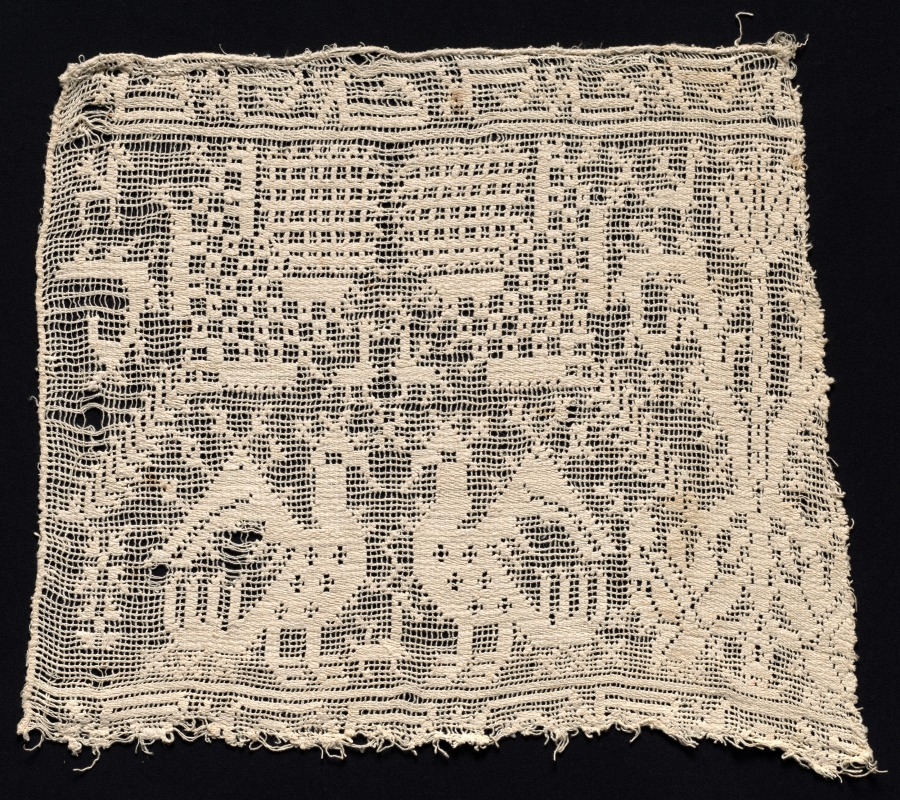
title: Fragment of a Band with Confronted Birds, a Formal Tree, and Smaller Animals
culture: Italy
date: 1500s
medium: Bleached linen (est.): needle lace, burato (twined ground and darned in one direction)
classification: Lace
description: Birds, perhaps eagles, confront each other on this corner fragment. Of particular interest is how they are surrounded by smaller animals and framed by a geometric structure. This could reference a family’s heraldry, or show the lace maker’s skill in rendering figural and geometric motifs.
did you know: The word lace derives from the Latin laqueus, meaning noose.